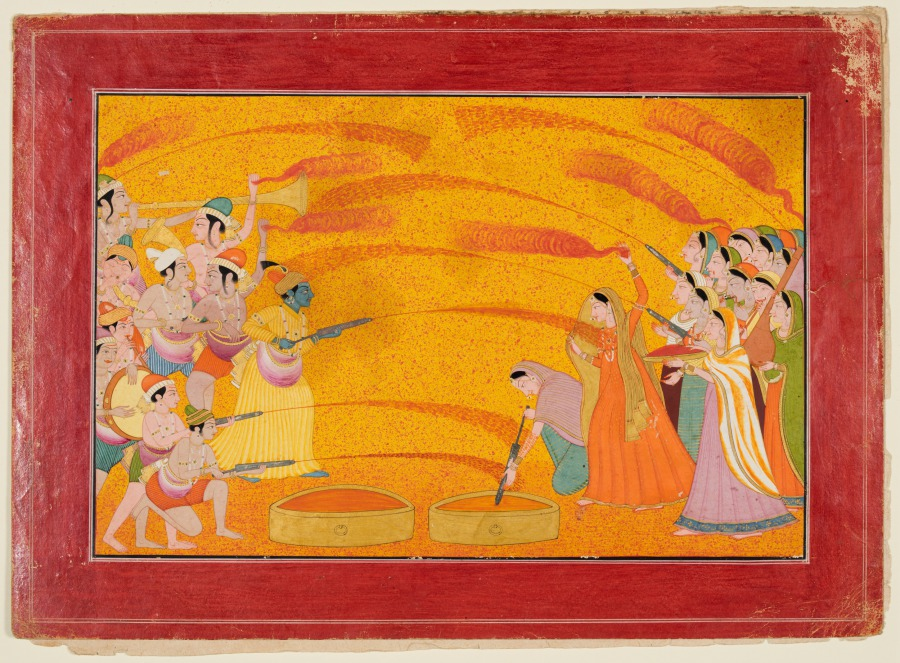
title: Krishna celebrates Holi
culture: Northern India, Pahari kingdoms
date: c. 1770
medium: gum tempera, gold, and silver on paper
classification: Painting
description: During the festival of Holi, Hindus celebrate the coming of spring by playfully throwing and shooting colored water and powders at one another. Among all the cowherd boys with whom he grew up, Krishna, a Hindu god incarnated on earth, is the only one able to reach the heart of a gopi, or milkmaid, with a well-aimed plunger full of colors. Raucous with sound as well as color, some of the boys play the drum, flute, and horns; girls strum a vina (stringed instrument), play a flute, and blow a whistle.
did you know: The painter has sprinkled color on the background to suggest colors thrown in the air.